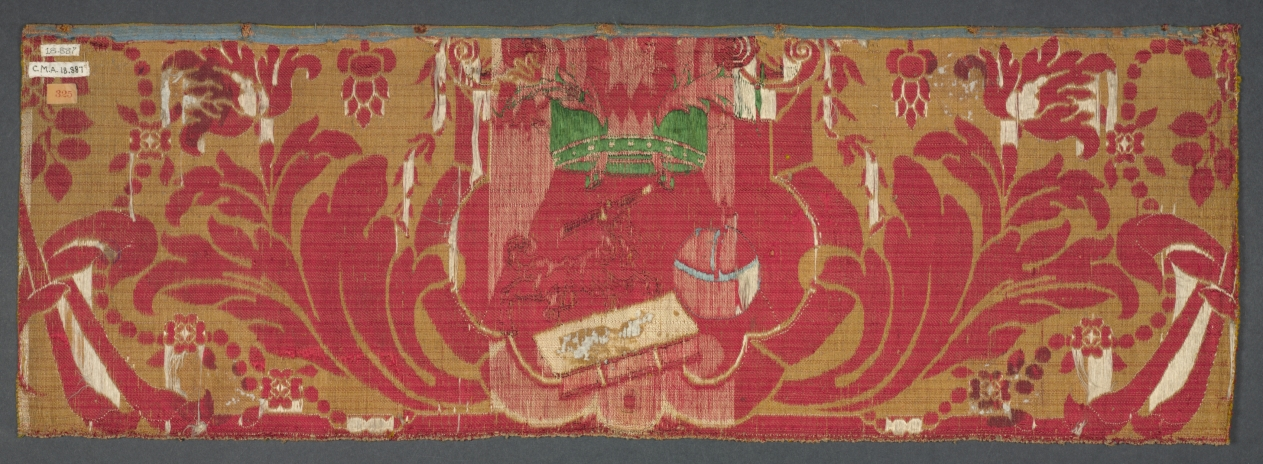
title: Textile Fragment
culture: Italy or Spain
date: 1600s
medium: brocaded silk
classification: Textile